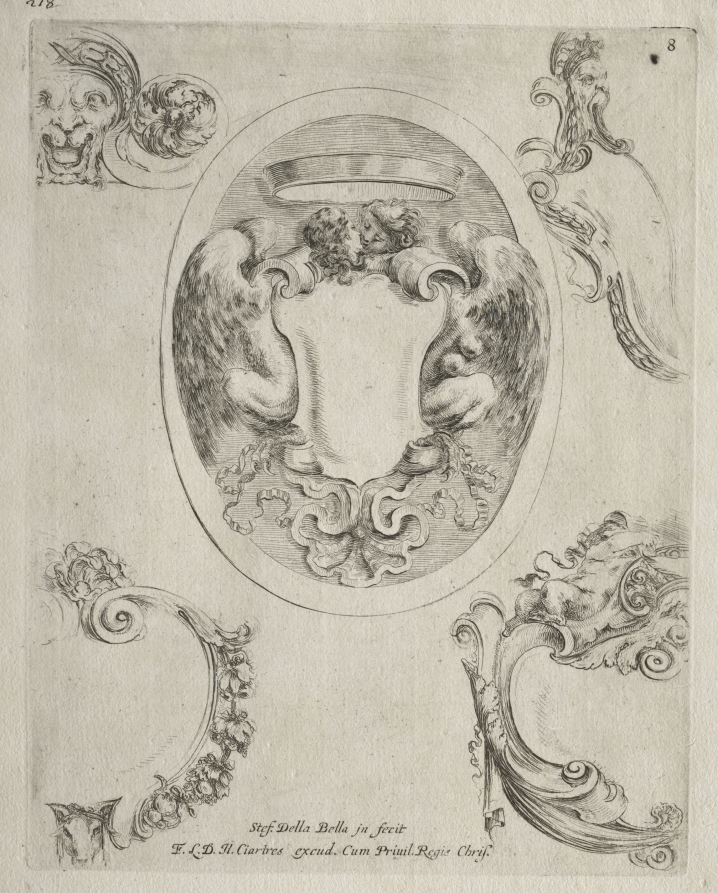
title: Collection of Various Caprices and New Designs of Cartouches and Ornaments: No 8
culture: Italy, 17th century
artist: Stefano Della Bella (Italian, 1610–1664)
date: 1646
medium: etching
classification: Print